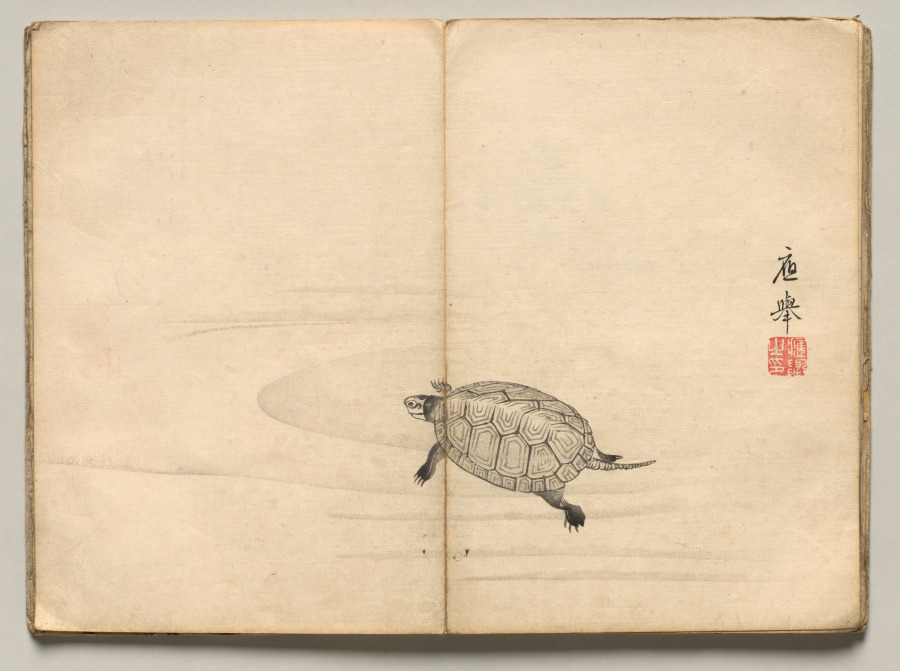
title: Turtle from Ōkyo Picture Book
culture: Japan, Edo period (1615–1868)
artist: after Maruyama Ōkyo (Japanese, 1733–1795)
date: 1850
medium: accordion-style woodblock printed folding-book; ink and color on paper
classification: Bound Volume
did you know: This impression of a book of woodblock-printed designs is missing a spread that depicts a crane.